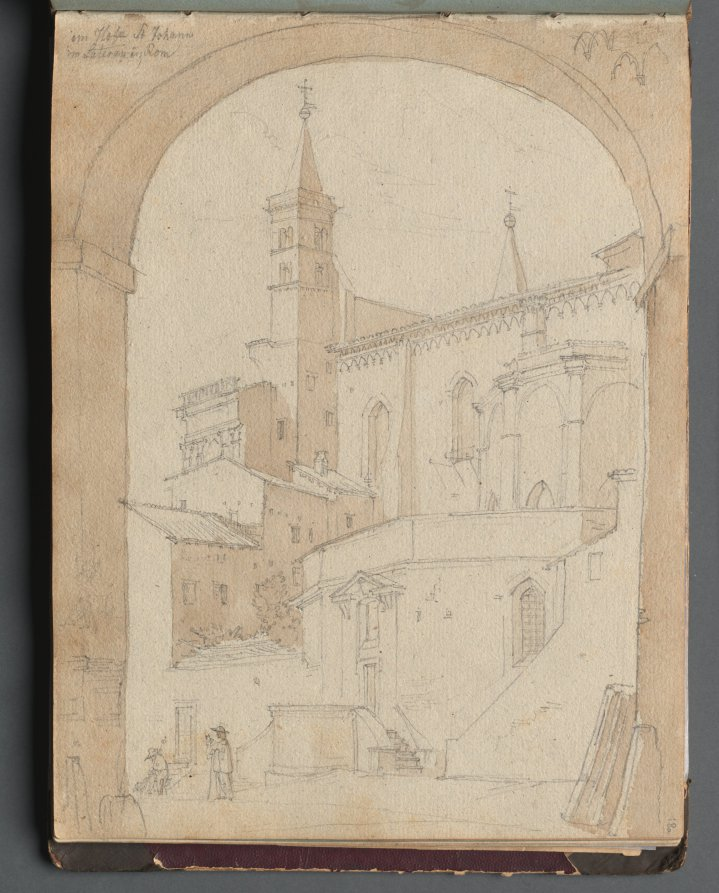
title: Album with Views of Rome and Surroundings, Landscape Studies, page 18a: Saint John Lateran, Rome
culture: Germany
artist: Franz Johann Heinrich Nadorp (German, 1794–1876)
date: c. 1830s-70s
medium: graphite and brown wash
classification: Bound Volume